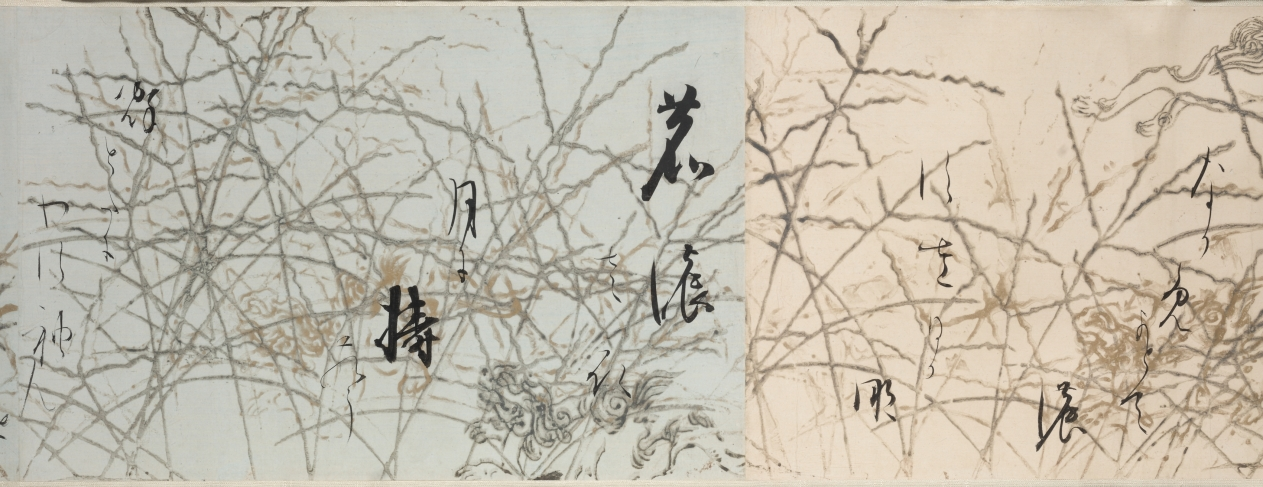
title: Selections from the New Collection of Japanese Poems from Ancient and Modern Times (Shinkokin wakashū) with Printed Designs of Chinese Lions and Crab Finger Grass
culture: Japan, Edo period (1615–1868)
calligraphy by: Hon'ami Kōetsu (Japanese, 1558–1637)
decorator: Tawaraya Sōtatsu (Japanese, c. 1570–c. 1640)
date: early 1600s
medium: handscroll; ink, gold, and silver on paper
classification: Calligraphy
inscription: Seal: 光悦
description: Hon’ami Kōetsu was a calligrapher and craftsman who frequently collaborated with the painter Tawaraya Sōtatsu, considered the first master of the Rinpa school. Kōetsu brushed seven poems from the autumn section of a poetry anthology onto dyed paper with motifs designed and printed in gold and silver by Sōtatsu.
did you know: Before becoming a master painter of screens, Tawaraya Sōtatsu painted fans.